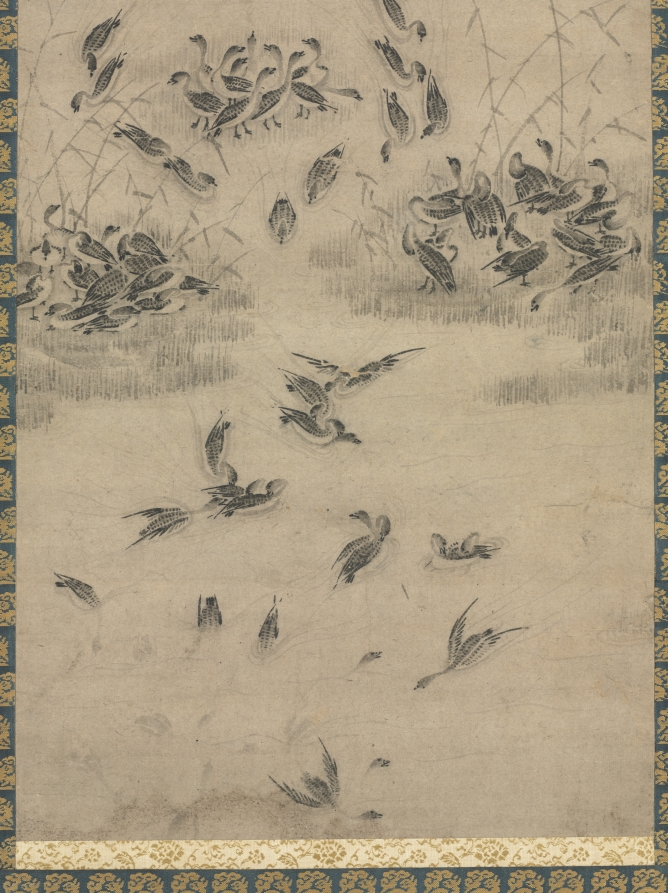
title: Geese Returning Home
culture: Korea, Joseon dynasty (1392–1910)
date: 1600s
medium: hanging scroll; ink on paper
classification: Painting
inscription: three seals in upper right; one in upper left corner.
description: In this hanging scroll, wild geese are portrayed engaging in different activities: descending to a marsh, gathering in flocks, grazing on plants, and dipping their heads under the water. In Korean paintings, images of geese serve as the symbol of seasonal change because they migrate from northern areas such as Siberia to stay in the Korean Peninsula during the late fall and winter.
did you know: In Korea, the word for geese in a grove of reeds, noan, has the same pronunciation as the word for "the comfortable life at old age." With this double meaning for a happy life, the motif of returning geese gained popularity in paintings.